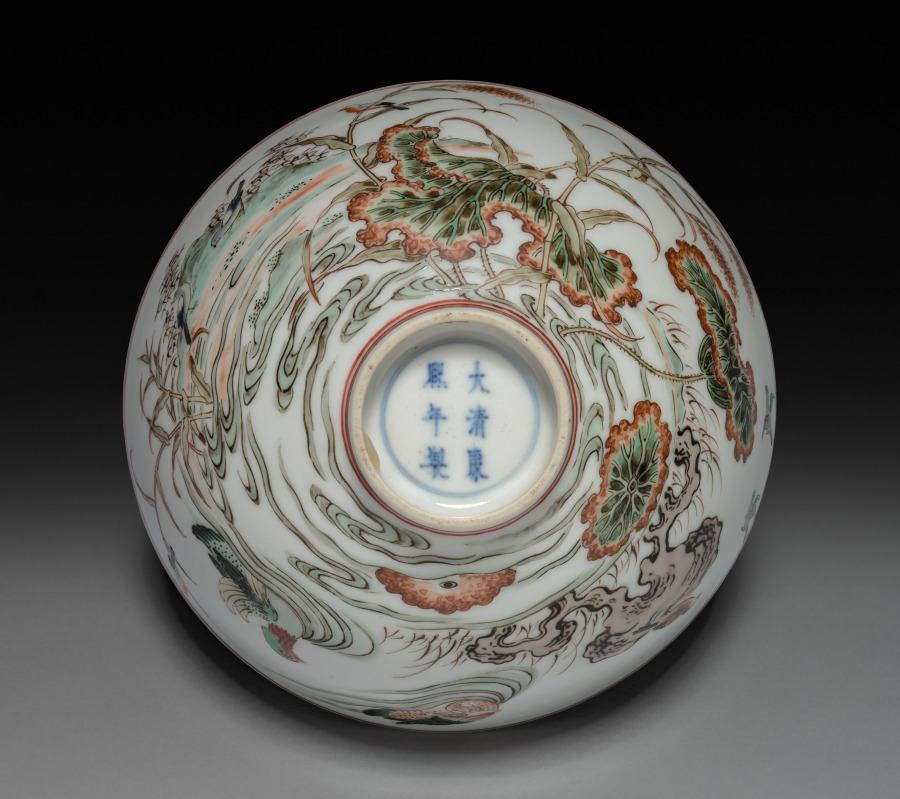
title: Bowl with Waterfowl on a Lotus Pond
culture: China, Jiangxi province, Jingdezhen kilns, Qing dynasty (1644-1911), Kangxi reign (1662-1722)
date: 1662–1722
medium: porcelain with famille verte overglaze enamel decoration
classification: Ceramic